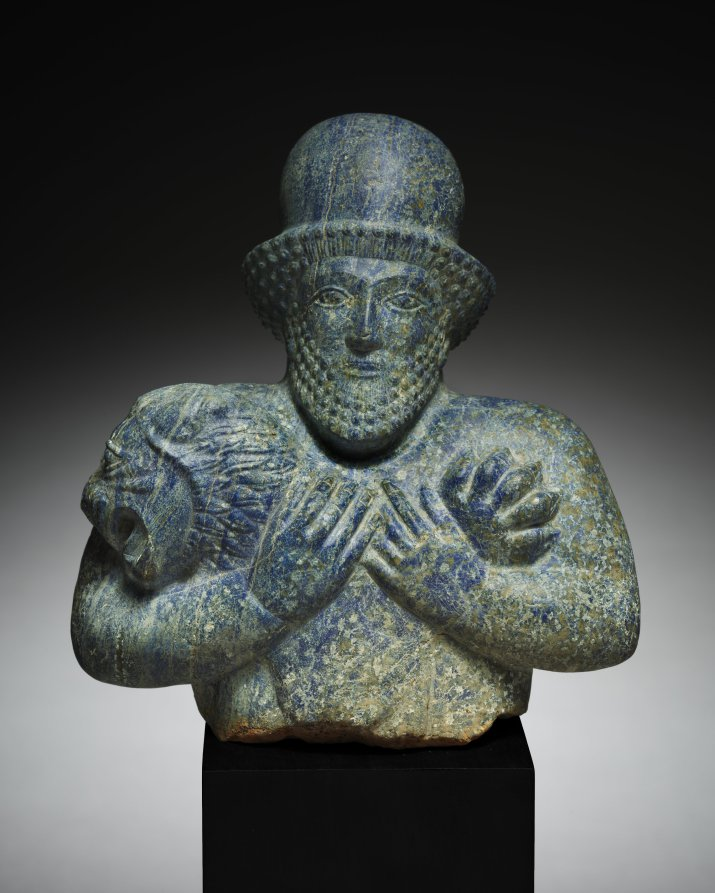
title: Median Lion Strangler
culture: Iran, Achaemenid (550–330 BCE)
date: 500–450 BCE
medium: lapis lazuli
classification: Sculpture